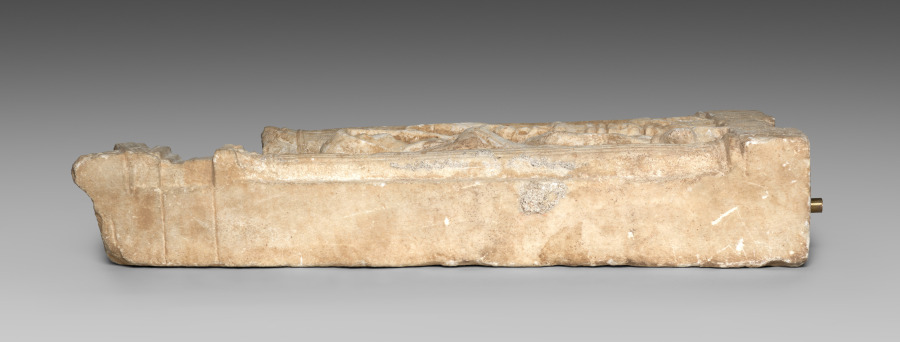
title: Grave Stele (Relief)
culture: Southern Anatolia, Pamphylia, Hellenistic Greek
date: c. 50 BCE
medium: marble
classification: Sculpture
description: The multiple figures, inscription, use of perspective, and architectural frame distinguish this ambitious relief as one of the most important of its type. The Greek inscription on the base reads, “To Sbardia, also named Tate, Eumelos, son of Aphrodisios, her father, [set this up].” The deceased is shown seated on an elaborate chair. A servant girl holding a fan suggests Sbardia’s high social standing. At the bottom right corner, a hen perches on an upturned basket, a symbol of “the good life.” The stele incorporates a “springing” gable supported by engaged half columns with simplified Corinthian capitals. Other features relate to beliefs about mortality and the afterlife. Above and to the left of her chair is her winged psyche (soul) shown leaving her body. Figures of the three fates are shown in the pediment above, reminding us that human life is finite.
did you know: The seated woman is depicted larger to visually emphasize her importance; her servant is in the background.